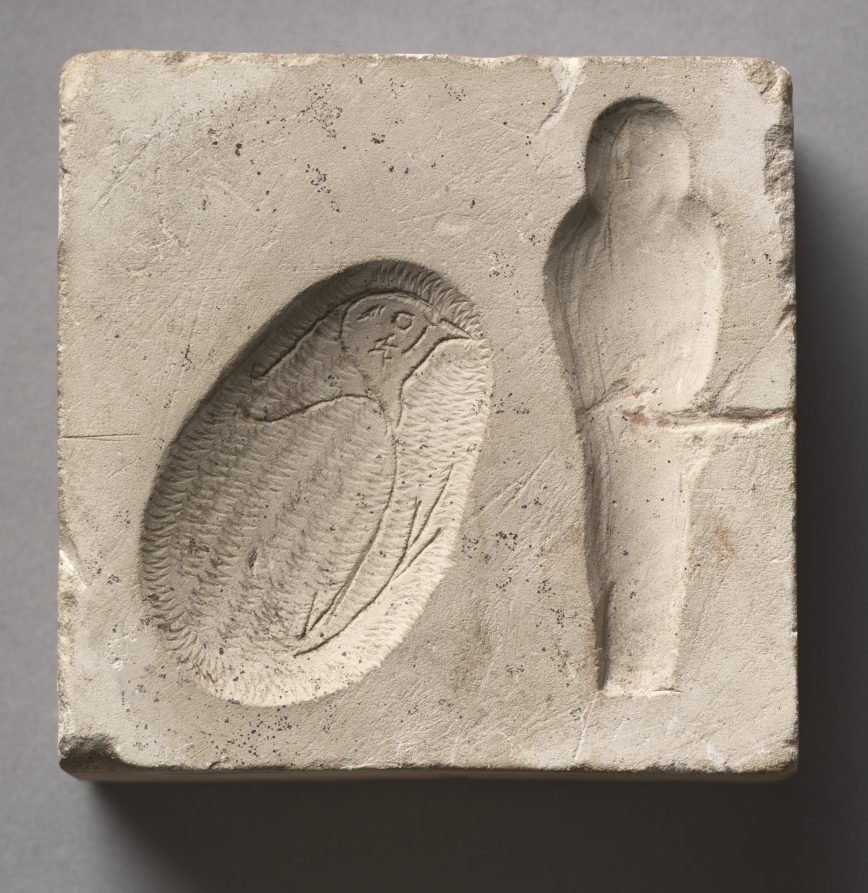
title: Mold in Two Parts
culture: Egypt, Greco-Roman period (332 BCE–395 CE), Ptolemaic dynasty (305–30 BCE) or later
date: 305–30 BCE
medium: limestone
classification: Sculpture